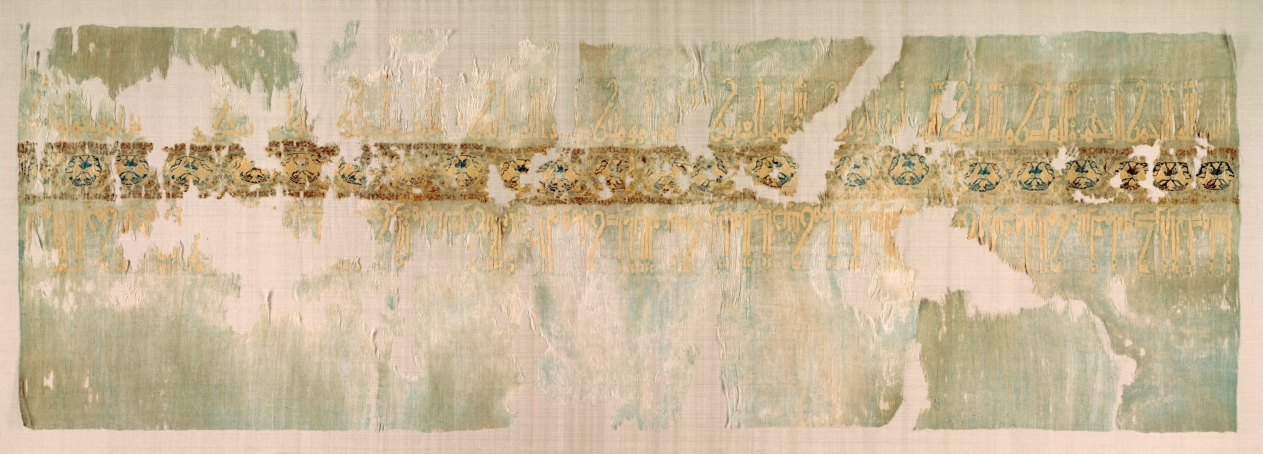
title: Turban end with tiraz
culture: Egypt, Tinnis, Fatimid period, datable to 983-90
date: 983–990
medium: plain weave with inwoven tapestry weave: linen and silk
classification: Textile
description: This finely woven linen cloth, dyed a cherished pistachio color, was cut from a longer fabric worn folded and wrapped as a turban with the silk tapestry-woven decoration shown off in the front. It contains two opposing rows of nearly identical Arabic text separated by a row of medallions displaying a pair of birds. The historical text begins by praising Allah, asking that he assist the Caliph al-‘Aziz and bless him and his ancestors. The inscription also specifies that the vizier Abu ibn Yusuf ordered the cloth from the private factory (tiraz) in Tinnis. This luxurious cloth could have been a gift from the caliph in Cairo during the Fatimid period to a courtier or visiting dignitary. It is one of the finest known examples.